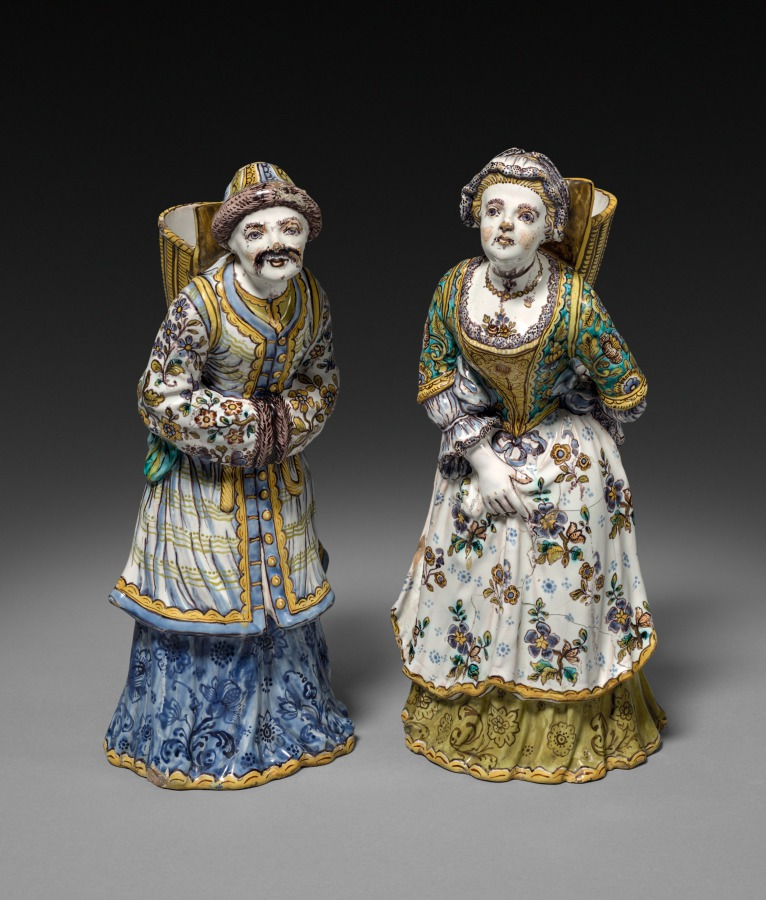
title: Set of figures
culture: France, Strasbourg, 18th century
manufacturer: Strasbourg Factory (France)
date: 1745–1750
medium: faience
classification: Ceramic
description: For several decades in the middle of the 18th century the Hannong family were proprietors of one of the best and most influential French faience factories at Strasbourg. Here German and French ceramic styles and techniques met and were fused. These figures were copied from a pair executed in Chantilly porcelain which in turn relied on a Meissen prototype.